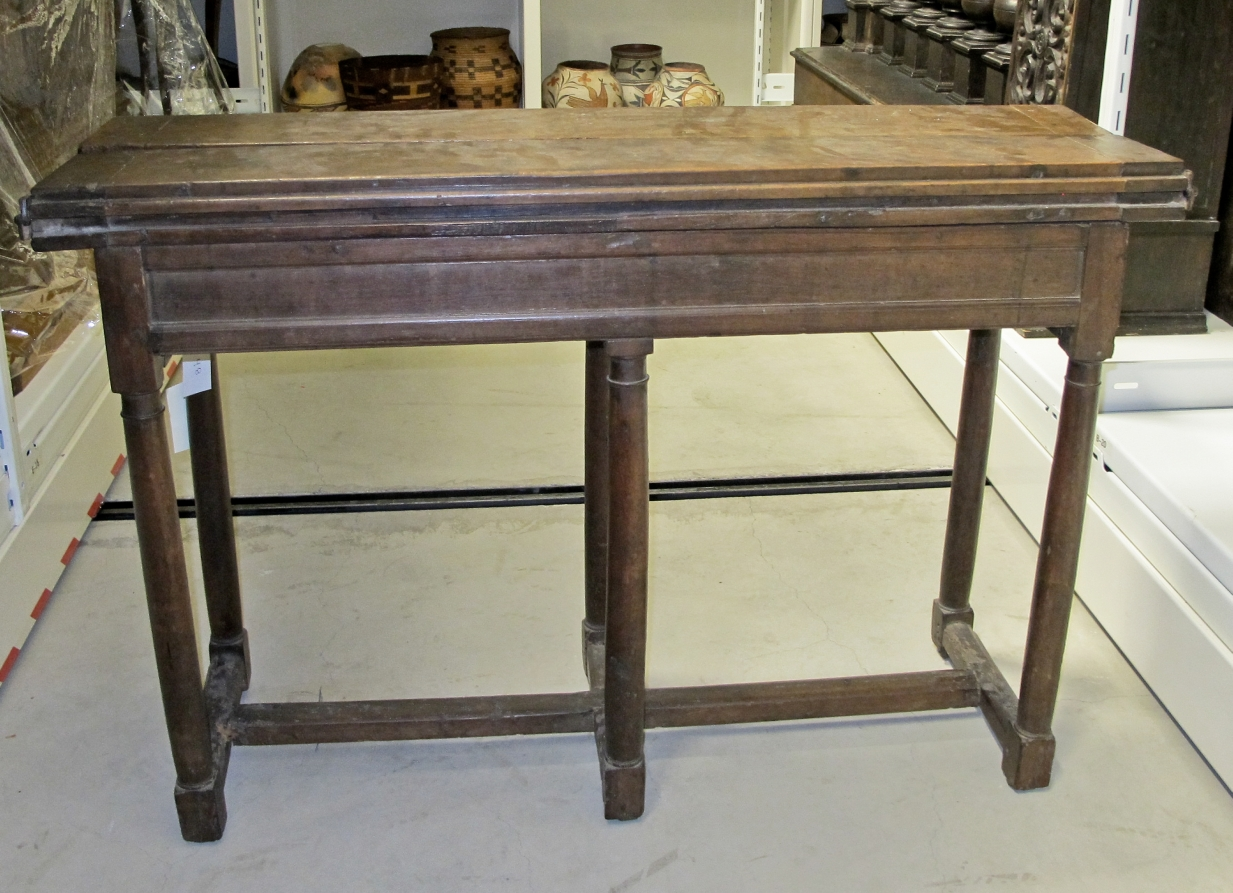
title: Table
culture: France, 16th century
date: 1550–1599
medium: walnut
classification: Furniture and woodwork